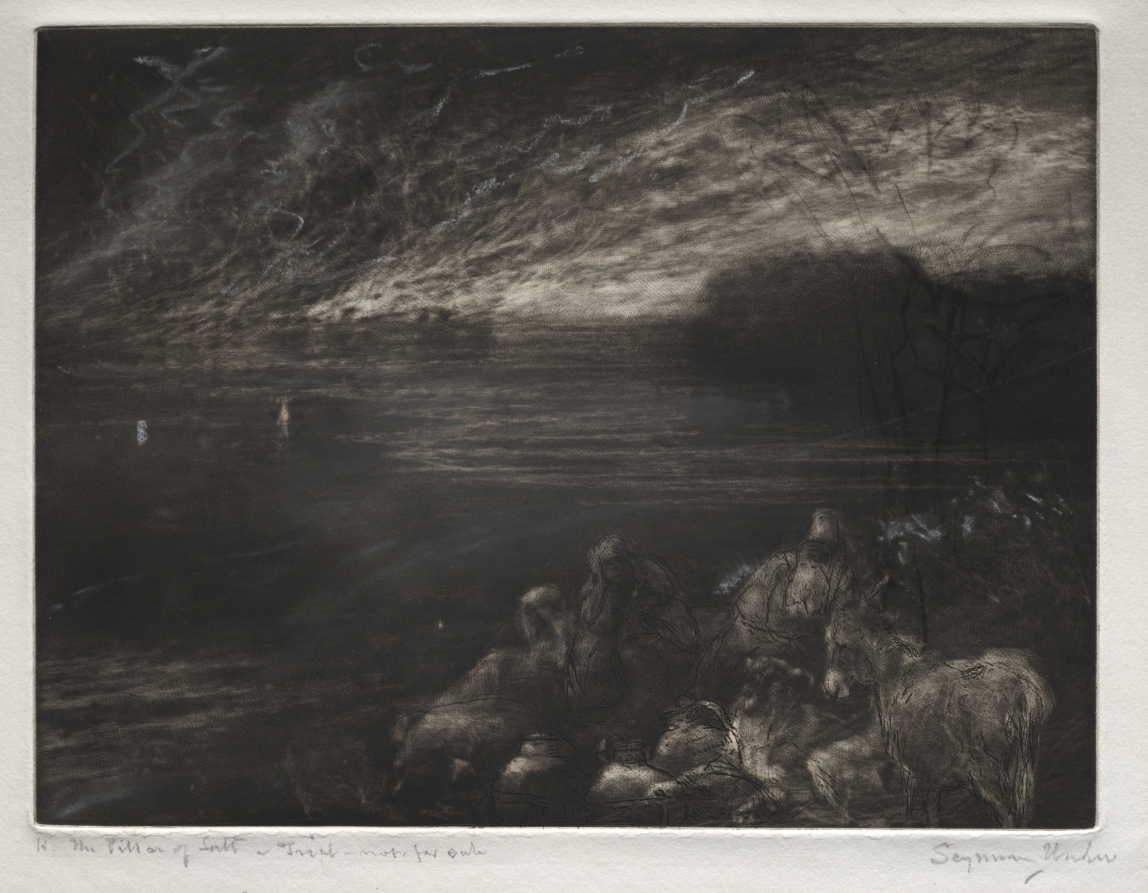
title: The Pillar of Salt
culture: England, 19th century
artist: Francis Seymour Haden (British, 1818–1910)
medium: etching and mezzotint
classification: Print